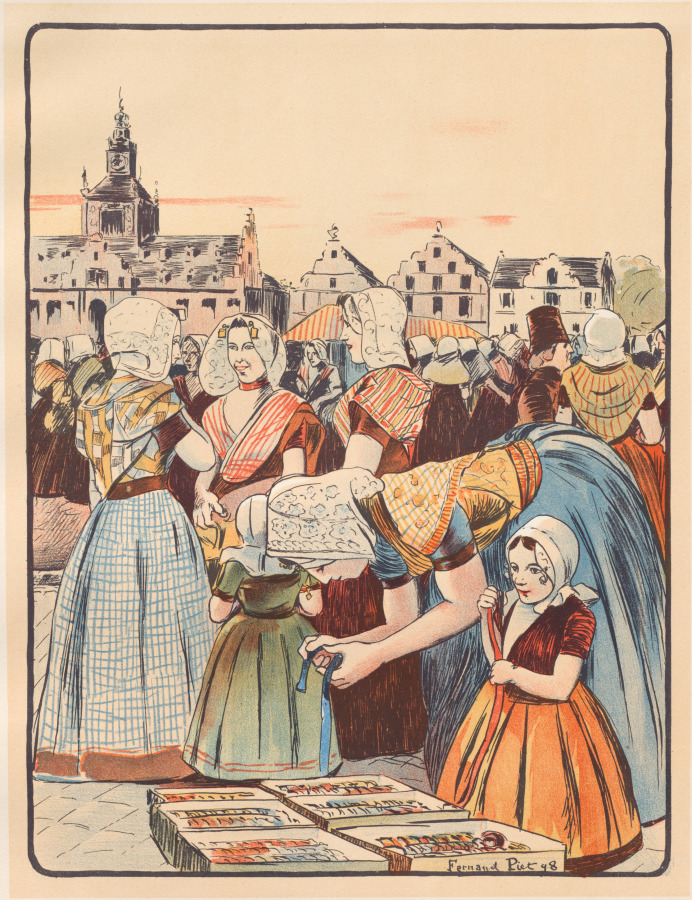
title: Un Marché en Zélande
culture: France, Paris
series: L'Estampe Moderne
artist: Fernand Piet (French, 1869–1942)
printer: Imprimerie Champenois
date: 1898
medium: Color lithograph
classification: Bound Volume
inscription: In plate: lower margin of image: Fernand Piet 98; lower right corner of sheet: blindstamp of l'Estampe Moderne (Lugt 2790)